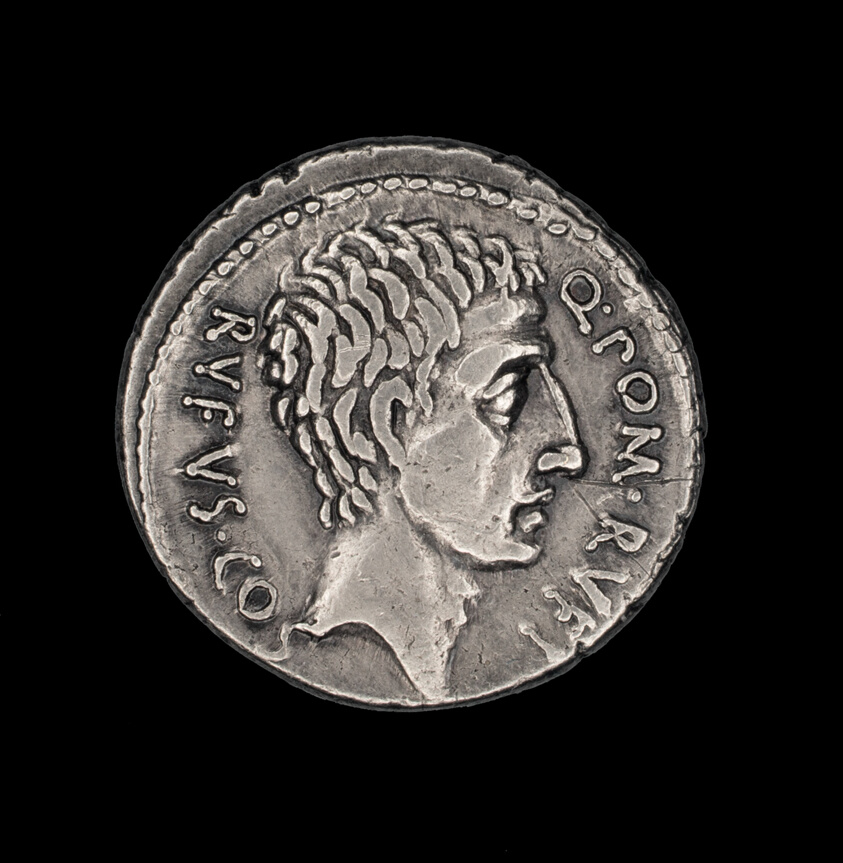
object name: Coin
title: Coin Portraying Q. Pompeius Rufus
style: roman (ancient, style or period), republic period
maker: Roman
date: 54 BCE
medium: Silver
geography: Roman Empire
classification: coin; ancient art